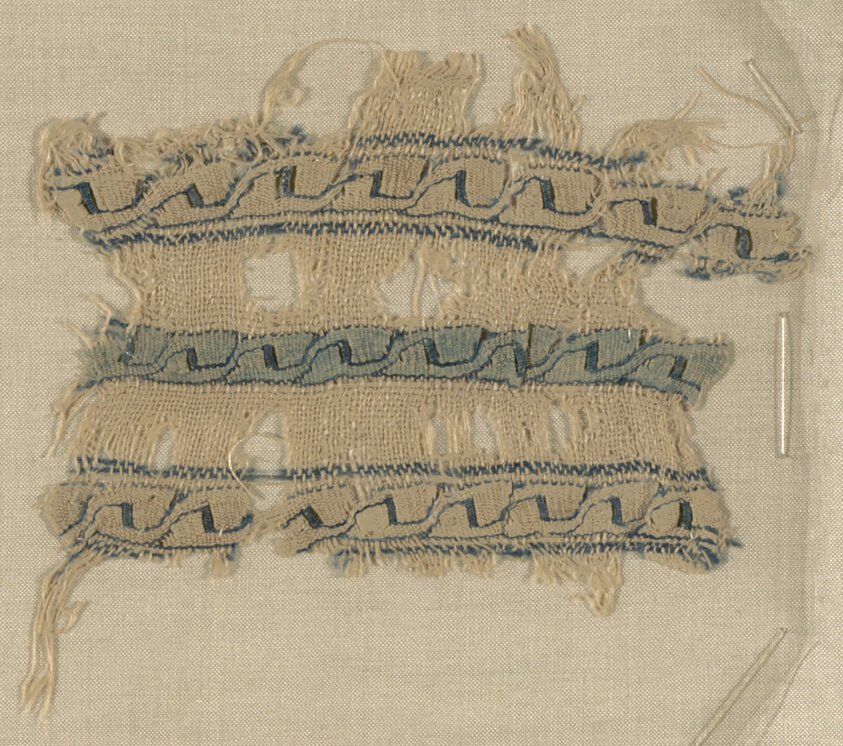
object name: Textile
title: Fragment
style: fatimid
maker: Egypt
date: Fatimid period (969–1171)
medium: Linen, tapestry weave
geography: Egypt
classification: textile; weaving